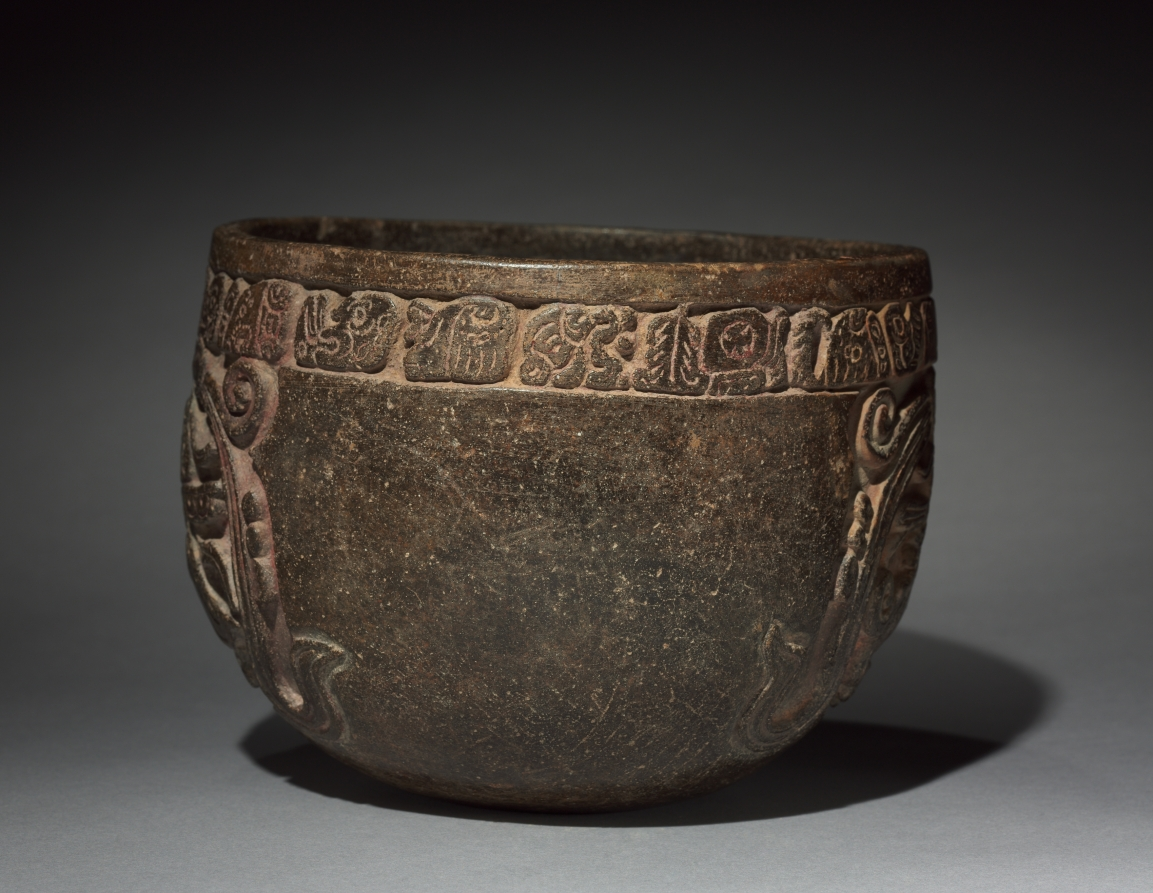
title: Carved Vessel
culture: Mexico, Campeche, Maya, Chocholá Style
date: c. 600–1000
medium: earthenware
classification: Ceramic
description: A firefly is carved on both sides of this Maya vessel, which is from the Yucatán Peninsula. Among the most common of insects to appear in Maya art, the firefly seems to be associated with things that twinkle in the dark—stars and cigars, the latter a symbol that identifies creatures of the night.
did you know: The text on the rim mentions a young man, suggesting this vessel was involved in a rite-of-passage ceremony.